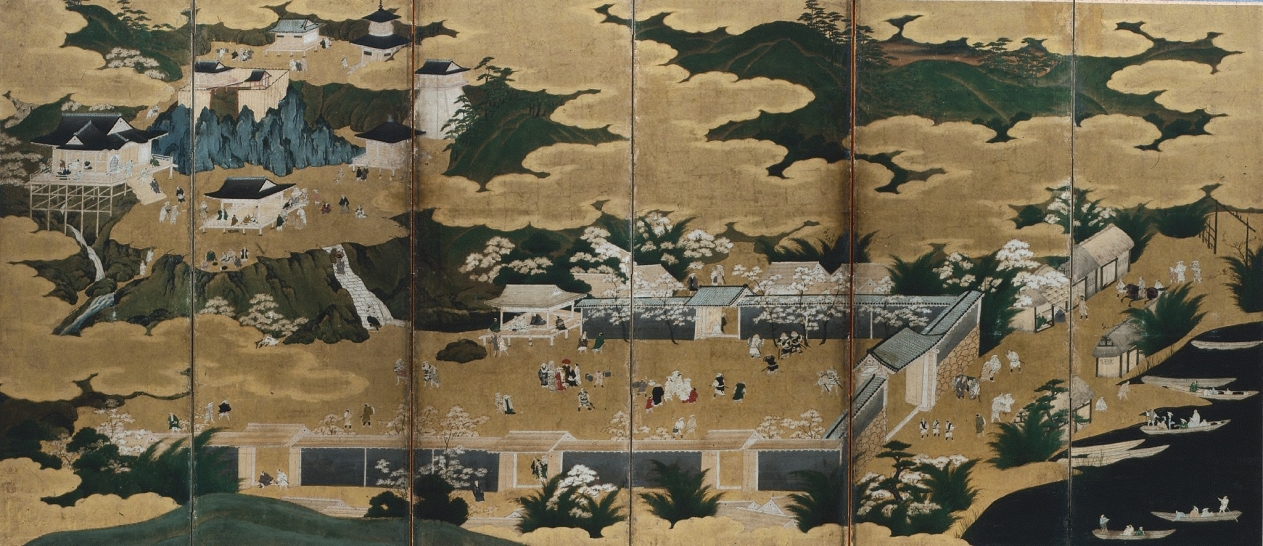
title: Famous Views of Ōmi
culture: Japan, Edo period (1615–1868)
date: 1660s–90s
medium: One of a pair of six-panel folding screens; ink, color, and gold on gilded paper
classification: Painting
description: Ōmi is an area around Lake Biwa near Kyoto. The Shinto shrine Hiyoshi Taisha and the Buddhist temple Ishiyamadera are in the upper right and upper left of the composition, respectively. At center is the pilgrimage route and people in the town before the temple gates. Harvested rice fields to the right and flowering cherry blossom trees at left show seasonal change from winter to spring.